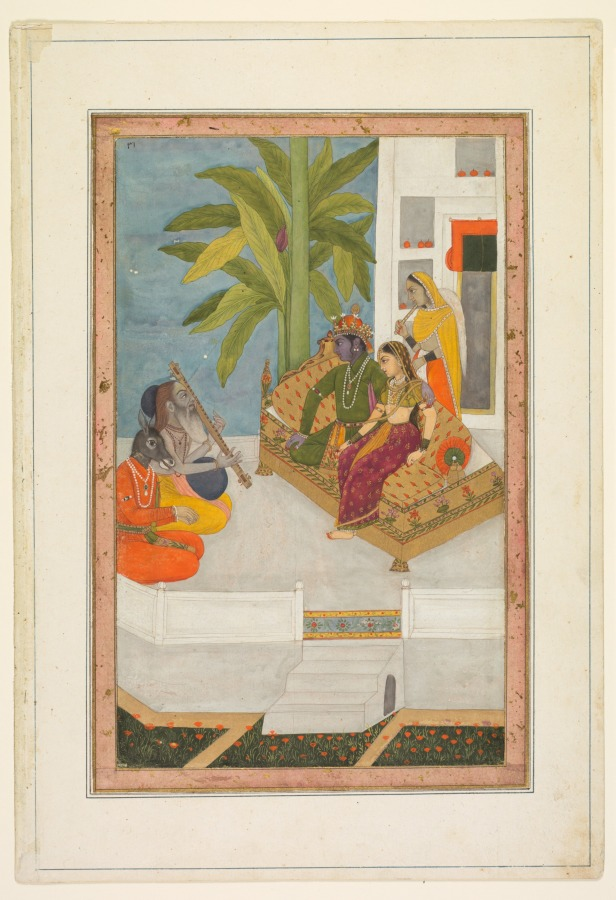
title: Shri Raga: An Illustration from a Ragamala Series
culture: India, Mughal, 18th century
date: c. 1740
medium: Gum tempera and gold on paper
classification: Painting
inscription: Inscription at top, Persian numerals: 31; Persian inscriptions on verso, in nasta‘liq script: 31 Sixth, Shri Raga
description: The verse associated with Shri Raga corresponds closely with this scene: His body, bluish in hue, is marvelously built. He is always graced with the company of auspicious Shri Lakshmi. He sits on a throne of gold, and before him Narada sits playing on his vina. He has decorated himself with garlands of flowers, and also with ornaments set with jewels. Shri raga is thus conceived in sentiment, of whom all learned men sing praises. The horse-headed figure claps his hands and accompanies the sage, wearing saffron garments and playing on the stringed instrument called a vina. He may be derived from the courtly commander of Indra, seen in the Jain manuscripts. Poppies bloom in the formal garden below the pure white terrace, and they are echoed by the oranges set on the windows of the house at the upper right.